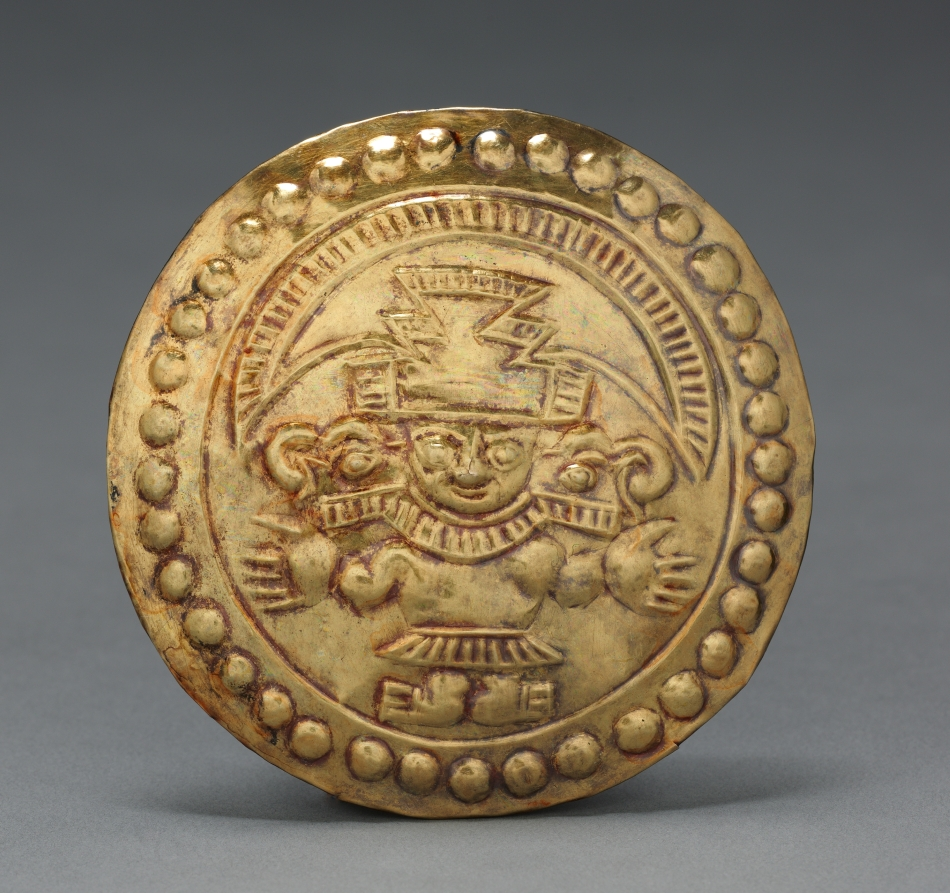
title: Ear Flare Frontal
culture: Peru, North Coast, Paramonga(?), Chimú style (900-1470)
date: Chimú style (900–1470)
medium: hammered gold alloy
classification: Jewelry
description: These gold discs, each with the image of a richly dressed Chimú lord, originally were attached to the fronts of ear ornaments equipped with long, thick shafts that passed through the ear lobes. Such ornaments were important markers of wealth and elite status.